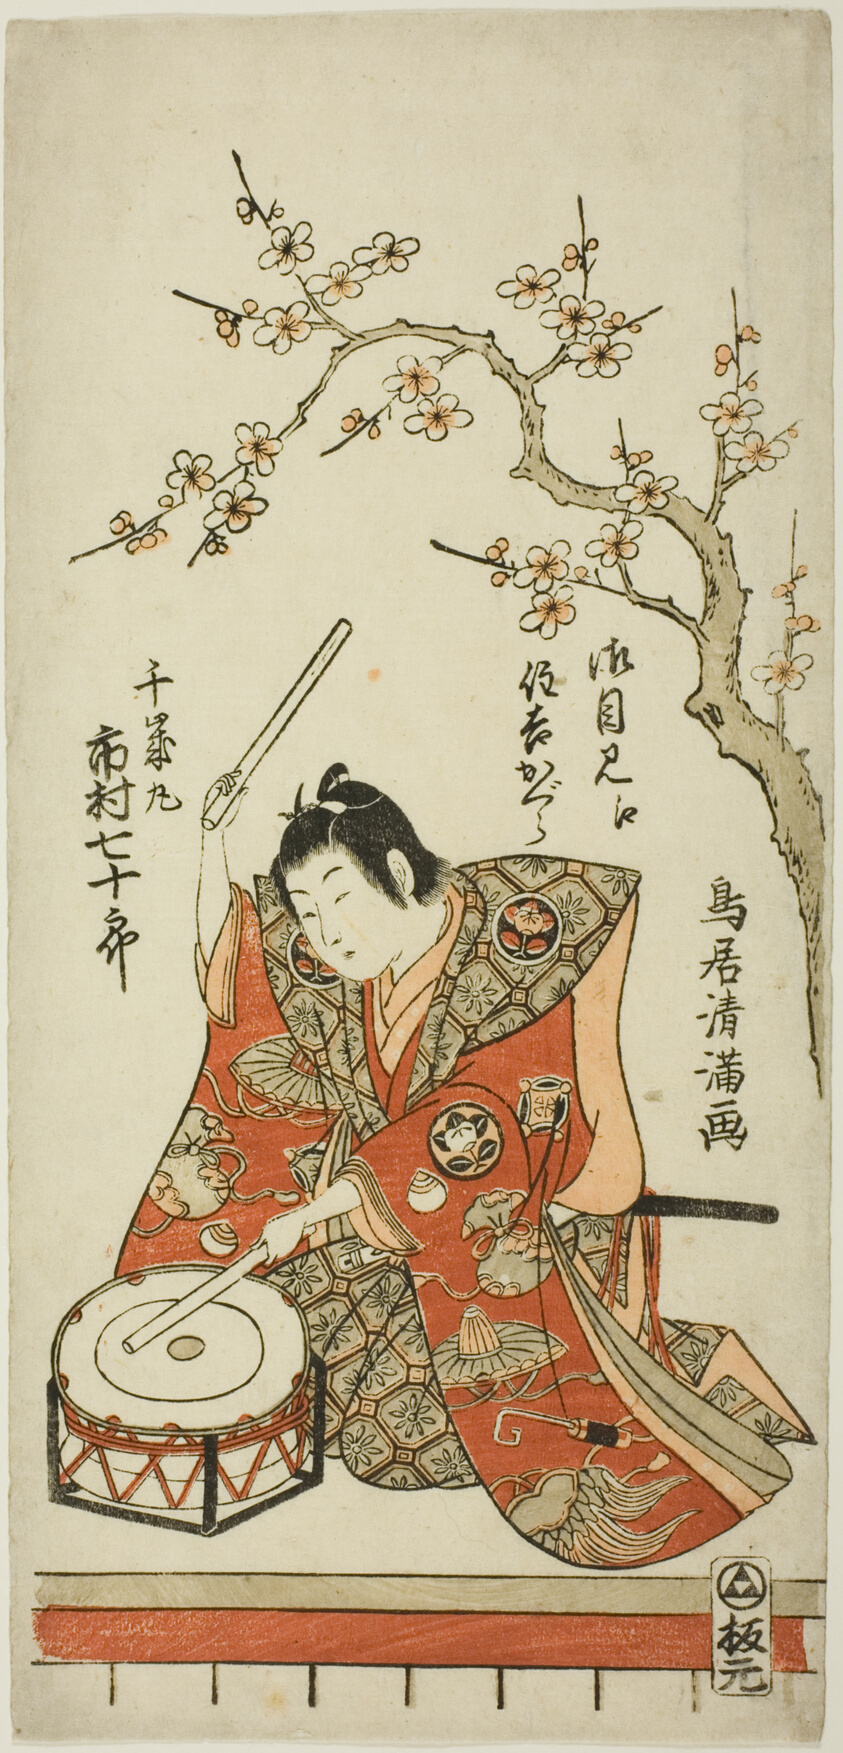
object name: Print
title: The Actor Ichimura Shichijuro (Uzaemon X) as Senzaimaru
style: Japanese (culture or style)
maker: Torii Kiyomitsu I (Japanese, 1735-1785)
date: c. 1759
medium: Color woodblock print; hosoban, benizuri-e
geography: Japan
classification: woodblock print; print; asian art